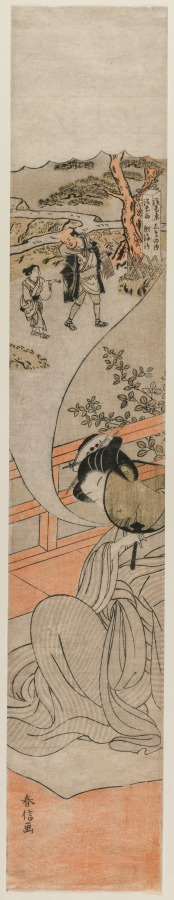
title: Courtesan Dreaming of her Childhood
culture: Japan, Edo period (1615–1868)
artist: Suzuki Harunobu (Japanese, 1724–1770)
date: c. 1770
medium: Woodblock print; ink and color on paper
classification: Print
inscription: Signature: Harunobu ga.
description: This print depicts a courtesan dreaming about the time she was taken from her family to become a courtesan. The man leading the girl by the hand is probably escorting her to the Yoshiwara, the entertainment district in Edo. This format is called a pillar print, or hashira-e (literally, "pillar picture"). It is made by pasting two sheets together vertically to form a long, narrow picture, often hung as a decoration on the narrow support posts of the interior of Japanese houses.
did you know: Pillar prints, or hashira-e (柱絵), are long and narrow Japanese woodblock prints originally intended to decorate wooden pillars.